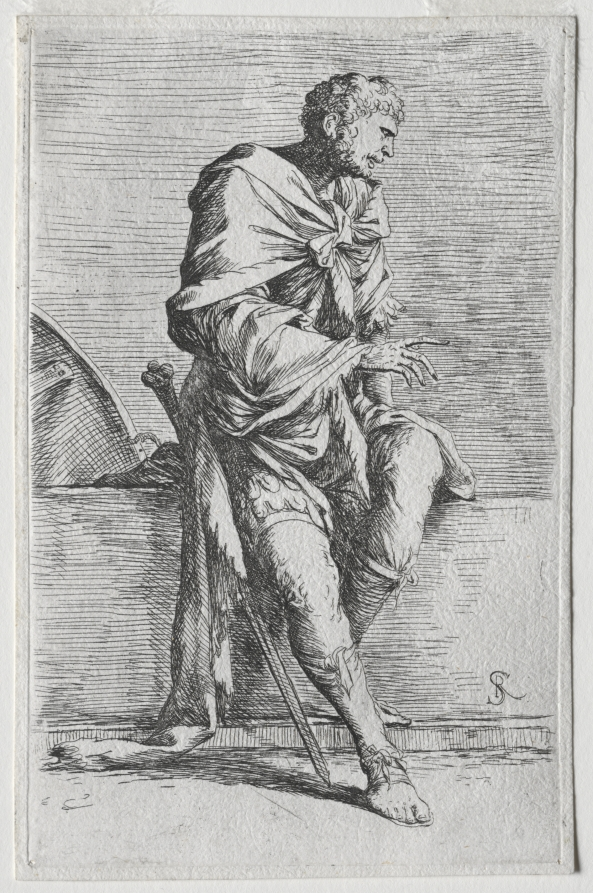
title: The Figurine Series: Figurina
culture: Italy, 17th century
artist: Salvator Rosa (Italian, 1615–1673)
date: 1656–57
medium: etching and drypoint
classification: Print